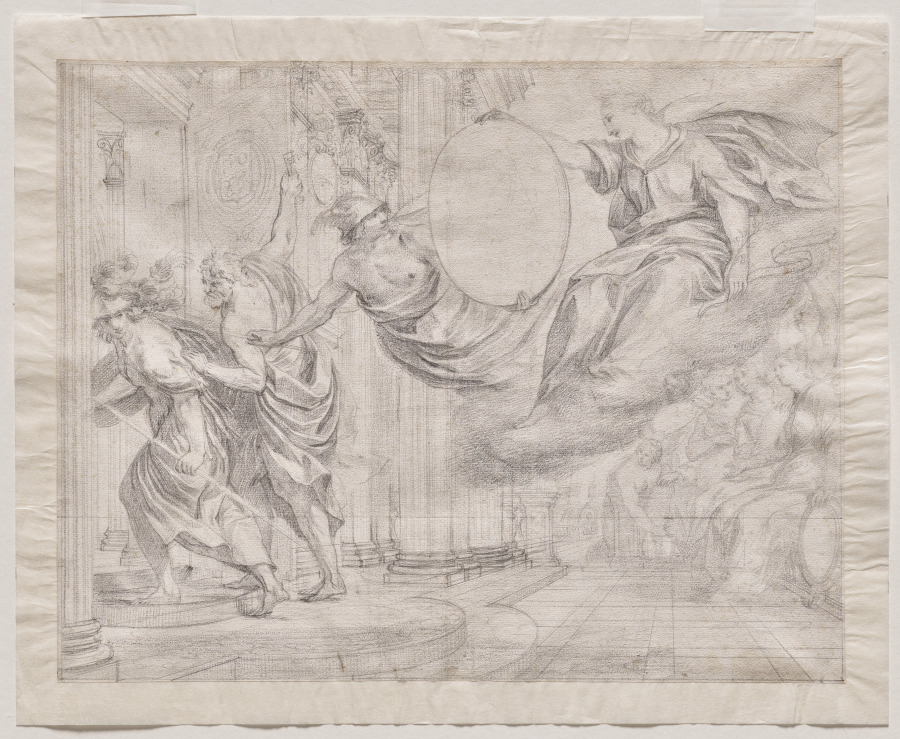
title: Allegory in Honor of Claude de Mesmes, Count d'Avaux (Allegorie en l'honneur de Claude de Mesmes, comte d'Avaux)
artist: Grégoire Huret (French, 1606–1670)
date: c. 1648–49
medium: Black chalk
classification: Drawing